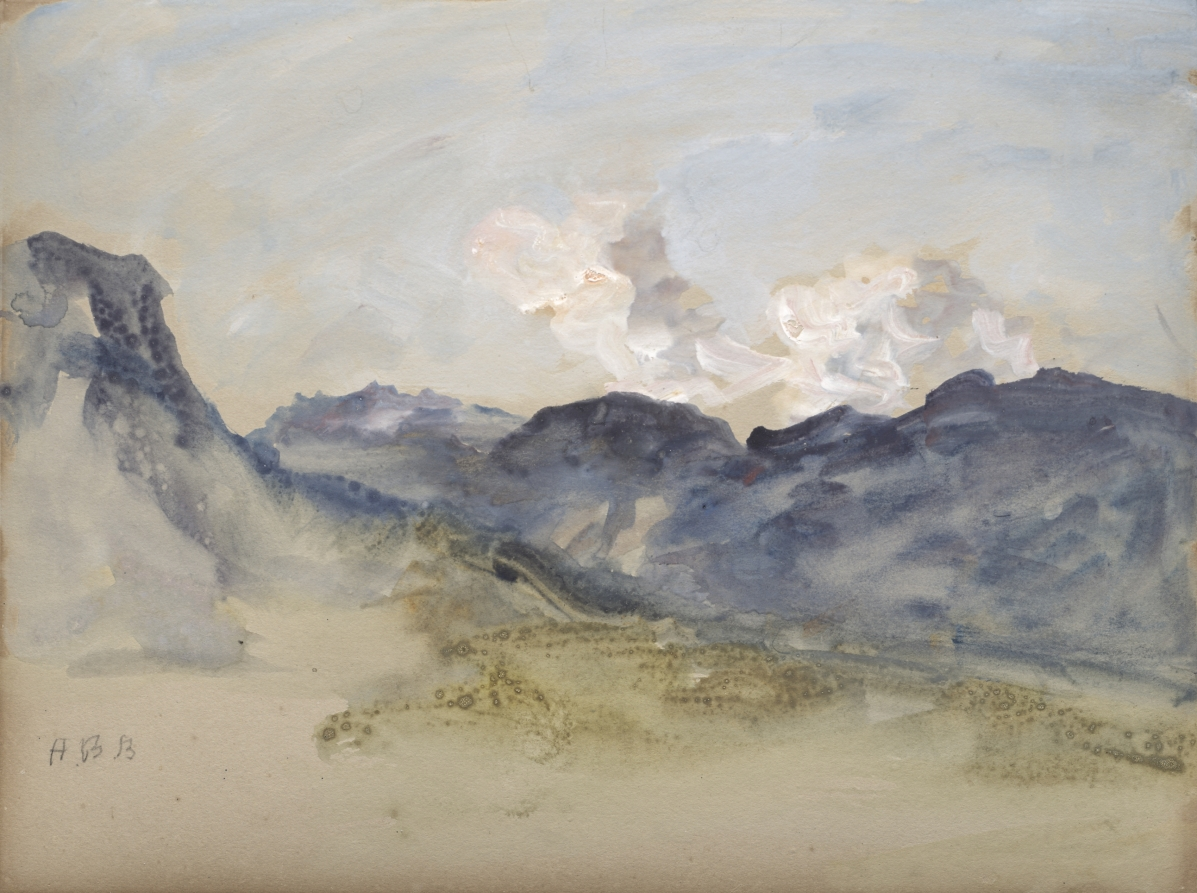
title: In the Alps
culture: England, 19th century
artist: Hercules Brabazon Brabazon (British, 1821–1906)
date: c. 1847–1906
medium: watercolor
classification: Drawing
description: Brabazon, the son of landed gentry, was a self-taught amateur who dedicated himself to watercolor. He lived on his family’s estates in Sussex and made annual trips to the Continent, particularly the Swiss Alps and the Mediterranean. Brabazon was a friend of John Ruskin (also in this gallery), and the two artists traveled and painted together in northern France in 1880. During the last decades of the 19th century, Brabazon’s strikingly modern watercolors, characterized by mere suggestions of mountains, sky, and water, became known and admired among a younger circle of artists.